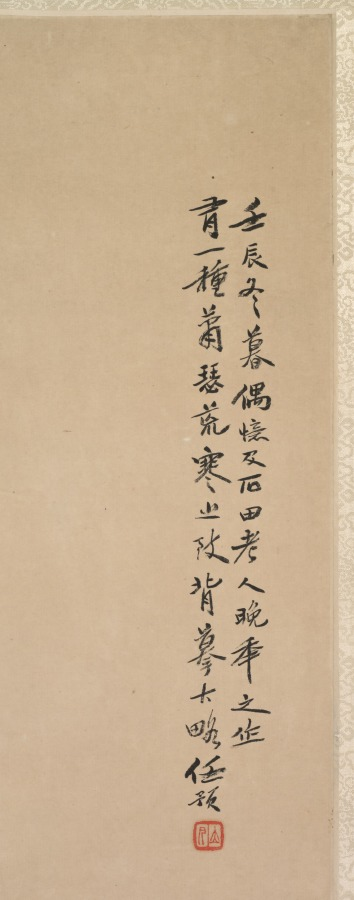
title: Landscape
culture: China, Qing dynasty (1644-1911)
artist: Ren Yu (Chinese, 1853–1901)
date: 1892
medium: Hanging scroll; color on paper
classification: Painting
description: This seasonal landscape is from a set of four hanging scrolls by Ren Yu. He was the youngest, most eccentric, and least prolific of the Four Rens, a family of prominent painters in Shanghai during the late Qing dynasty (1644–1911). Perhaps due to his opium habit and subsequent financial difficulties, Ren Yu tended to be lackadaisical in his work. The few remaining high-quality paintings hint at his artistic potential lost to opium. Though Ren’s premature death left his artistic promise unfulfilled, his paintings were acquired and donated to the museum by Charles Lang Freer (1854–1919), a wealthy businessman and art collector from Detroit. As Freer had hoped, this donation of Ren Yu paintings inspired the young Cleveland Museum of Art to continue to expand its own Chinese painting collection.